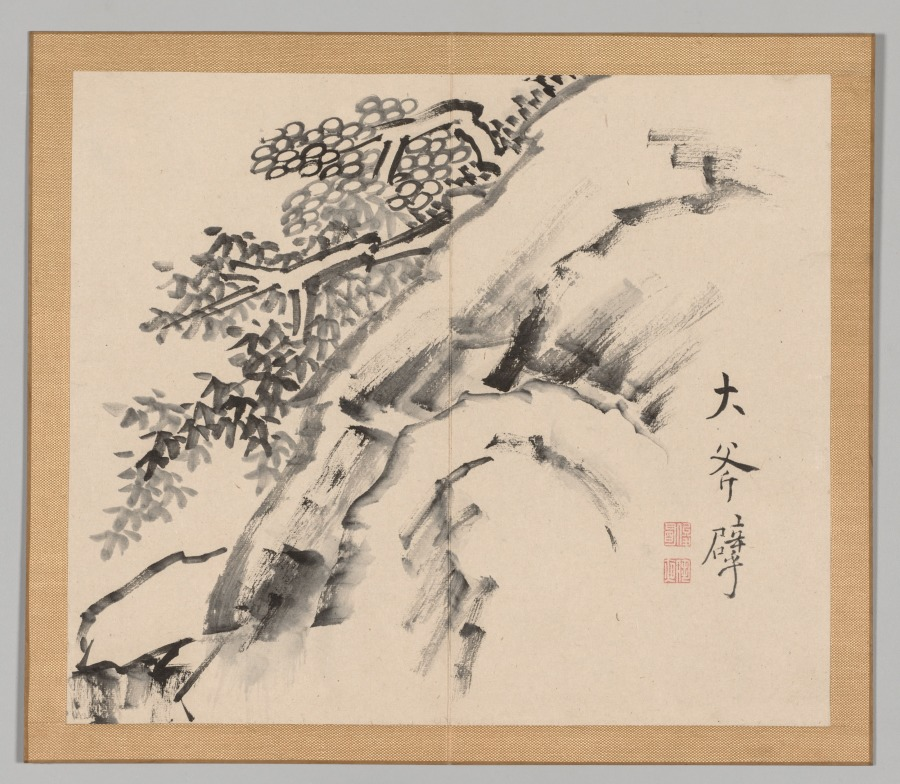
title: Reverberations of Taiga, Volume 1 (leaf 9)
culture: Japan, Edo period (1615–1868)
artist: Aoki Shukuya (Japanese, d. 1802)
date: mid- to late 1700s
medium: double-leaf from a pair of albums; ink and light color on paper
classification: Portfolio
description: Traditionally, young painters in Japan began their studies with an established master-painter. The master's compositions invariably became models that the apprentice copied to learn various ink and brush techniques. Shukuya was a pupil of the famous Kyoto artist Ikeno Taiga, whose style is reflected in these sketches of rocks, trees, and mountains.